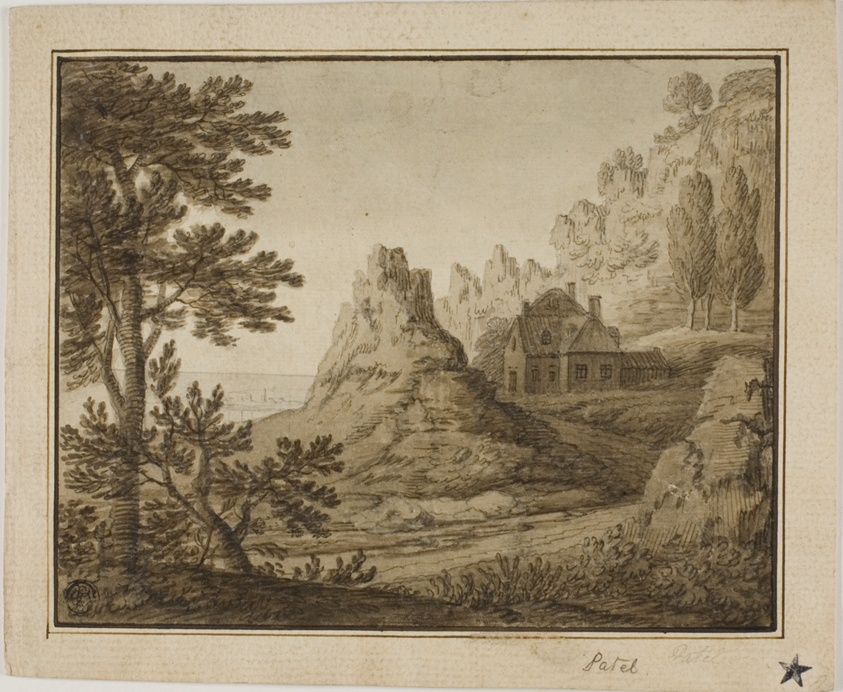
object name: Drawing and Watercolor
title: Mountainous Coastal Village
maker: Pierre Patel, I (French, c. 1605-1676); or Pierre Antoine Patel (French, 1648-1707)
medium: Pen and brown ink and brush and brown wash, over graphite, on cream laid paper, laid down on cream laid paper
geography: France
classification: pen and ink drawings; paper; brush and wash; drawings (visual works); prints and drawing